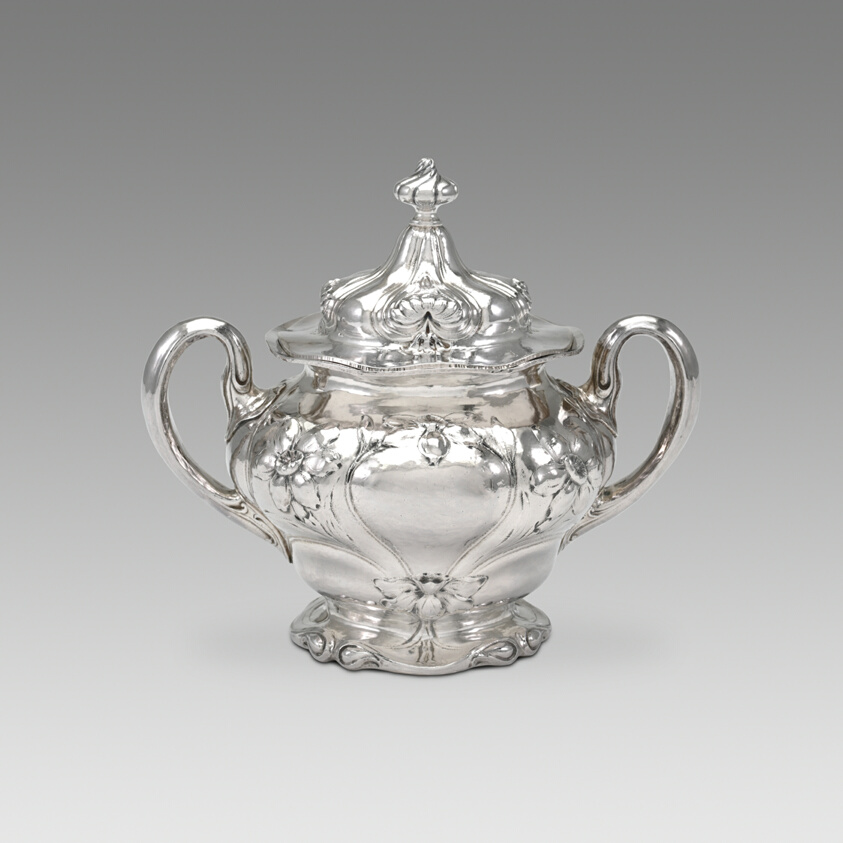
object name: Metalwork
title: Sugar Bowl and Lid (part of a set)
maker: Gorham Manufacturing Company (American, founded 1831); Providence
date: 1900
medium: Silver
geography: Providence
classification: sugar bowl; silver; american decorative arts; american arts; decorative arts